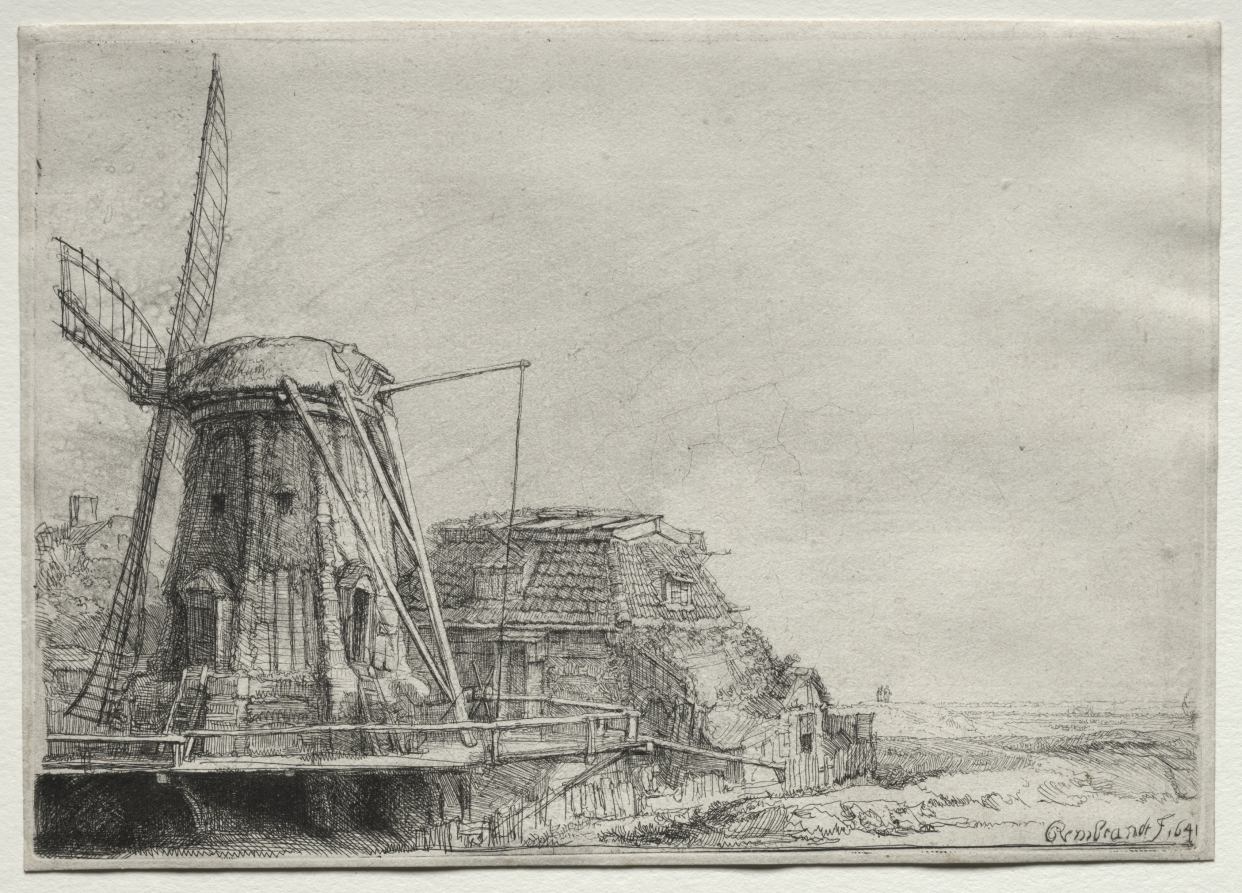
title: The Windmill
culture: Netherlands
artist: Rembrandt van Rijn (Dutch, 1606–1669)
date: 1641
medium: etching and sulfur tint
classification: Print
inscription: lower right, in plate: Rembrandt f 1641 ; VERSO, lower left, in graphite: 230; lower left, in graphite: B4c ; lower left, in graphite: el/ ; lower left, in graphite: B233 ; lower center, in graphite: C803 ; lower center, in graphite: W230 ; lower center, pen and brown ink: [J. W ?] ; B. lower right, in graphite: 560[underlined]